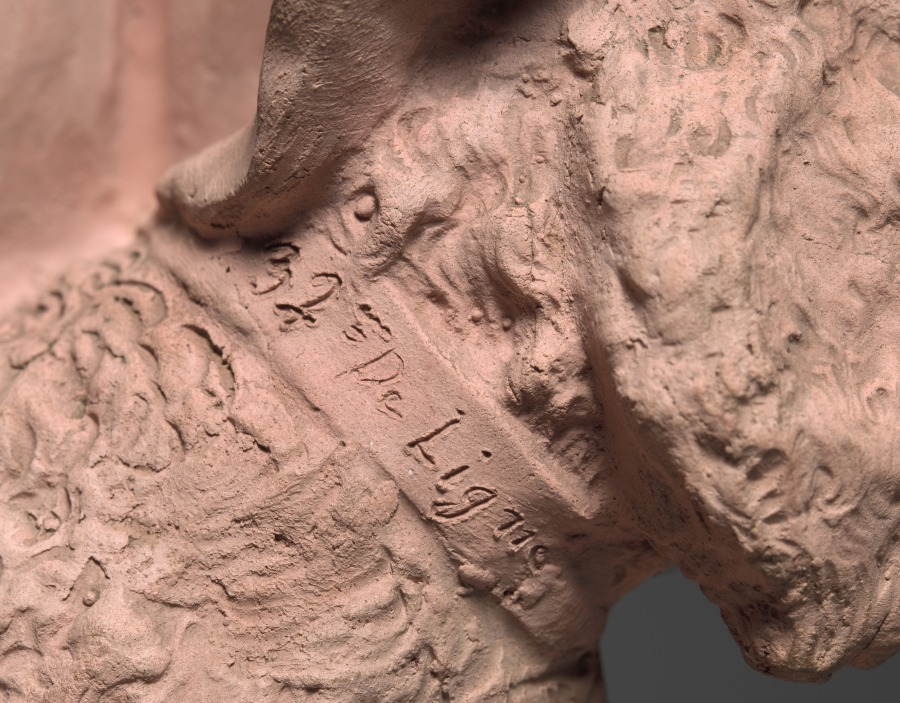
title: Brother and Sister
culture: France, 19th century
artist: Jean-Baptiste Carpeaux (French, 1827–1875)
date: 1875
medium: terracotta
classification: Sculpture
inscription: Signed "JBT" Carpeaux/1875" upper surface of base.